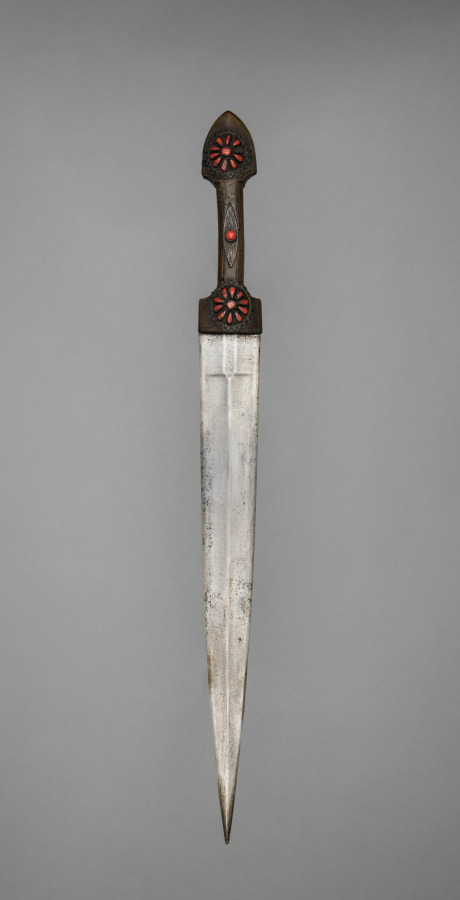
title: Dagger (Khanjali)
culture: Transcaucasian, Georgian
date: 1700s–1800s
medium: carnelian?, steel, wood handle, copper alloy, and silver gilt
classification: Arms and Armor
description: A khanjali is a dagger popular with the inhabitants of Georgia and the rest of the Caucasus since ancient times. They often have a single offset groove on each face of the blade and the shape is similar to the ancient Roman gladius and the Scottish dirk.